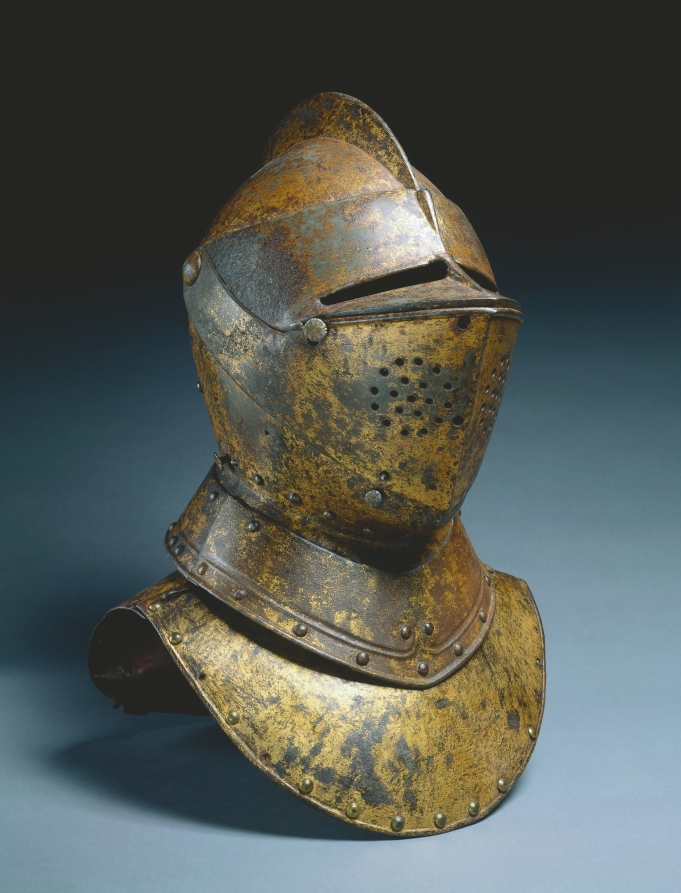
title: Close Helmet (from a funerary achievement?)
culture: Holland (?), late 16th-early 17th Century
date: c.1590–1625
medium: gilded steel (invaded with rust); red velvet lining, plume holder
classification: Arms and Armor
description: This helmet was originally intended for field use. Later, it seems to have served a funerary purpose, probably as an ornament (known as a funerary achievement) suspended over the church tomb of an unidentified knight. As such, it would have been a rich and imposing symbol of the dead knight's social rank and personal authority.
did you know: This helmet was decorated with a technique known as fire-gilding, an incredibly toxic process involving mercury that produced a gold finish, now worn away.